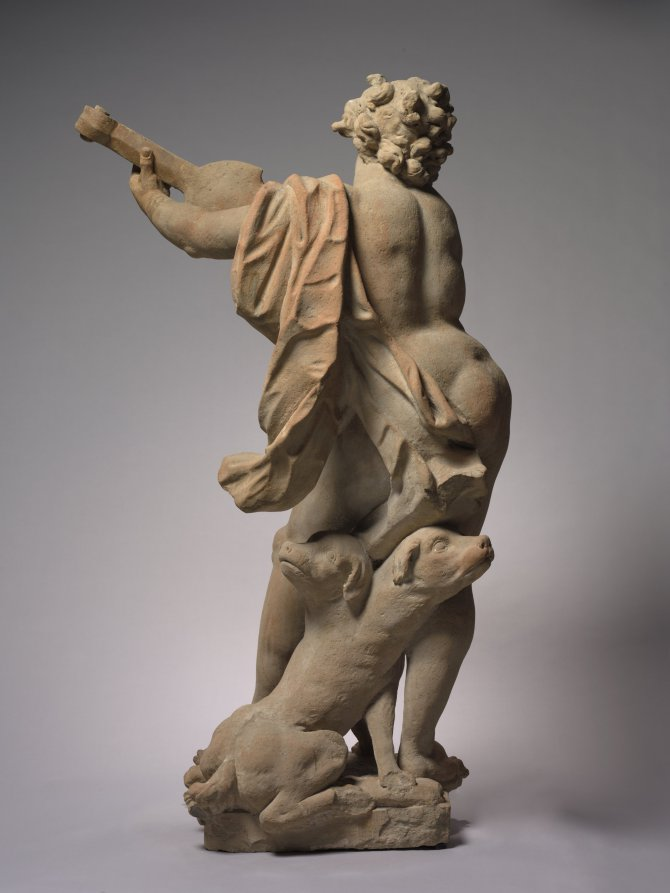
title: Orpheus and Cerberus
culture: Germany, near Bamberg, 18th century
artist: Ferdinand Tietz (Austrian, 1708–1777)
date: c. 1765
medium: sandstone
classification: Sculpture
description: This work was one of numerous sculptures Tietz created for the gardens of Schloss Seehof, near Bamberg in Bavaria (Germany), the summer residence of the Prince Bishops of Bamberg. The exaggerated forms of Orpheus's face and musculature caricature the idealized proportions of classical sculpture. A further parody exists with his companion: the usually terrifying hound Cerberus is here nothing more than a docile puppy, sitting calmly at Orpheus's feet. Meant to be viewed outdoors, on a high pedestal and from a distance, this work is less finely detailed than sculptures Tietz made for indoor settings at Seehof.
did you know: Taught to play the lyre by the Greek god Apollo, Orpheus's legendary musical abilities had the power to charm animals.